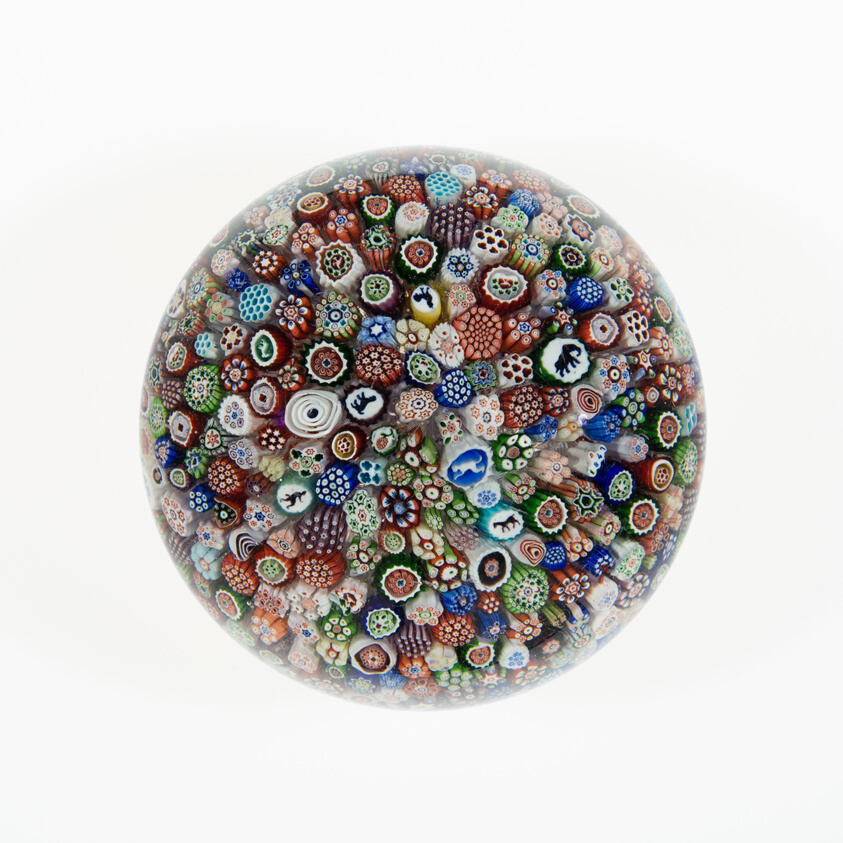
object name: Glass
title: Paperweight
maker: Baccarat Glassworks (Cristalleries de Baccarat); Lorraine, France, founded 1764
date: 1847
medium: Glass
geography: France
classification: paperweight; glass